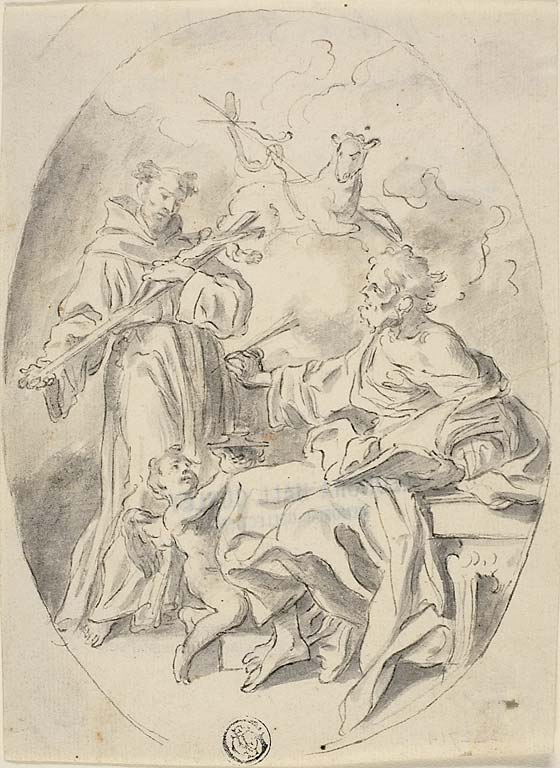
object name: Drawing and Watercolor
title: Saints Luke and Dominic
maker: School of Francesco Solimena (Italian, 1657-1747)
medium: Pen and black ink, with brush and gray wash, over black chalk, on ivory laid paper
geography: Italy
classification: pen and ink drawings; drawings (visual works); prints and drawing